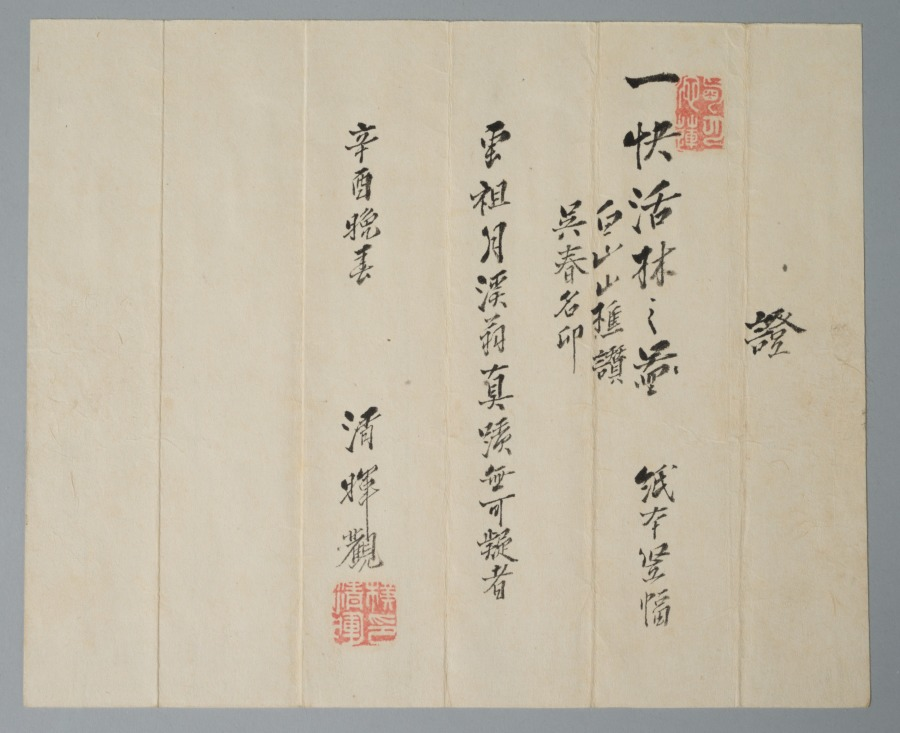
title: Happy Forest, from Water Margin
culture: Japan, Edo period (1615–1868)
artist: Matsumura Goshun (Japanese, 1752–1811)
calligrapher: and Amenomori Shōteki (Japanese, 1731–1786)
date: late 1700s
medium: hanging scroll; ink and color on paper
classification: Painting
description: The Chinese literary classic Water Margin is set in the 1120s and tells the story of 108 outlaws who first rebel against the government and then join forces with it. This painting depicts an episode in which hero Wu Song reclaims the tavern Happy Forest for its rightful owner, the prison warden’s son, Shi En. To prepare for the fight, Wu Song drinks a lot of wine. The painting was inscribed with a quote in which an ally describes Wu Song’s fighting style. It reads as follows: Where his twin fists rise, clouds and thunder roar, When his flying kick comes, wind and rain tremble.